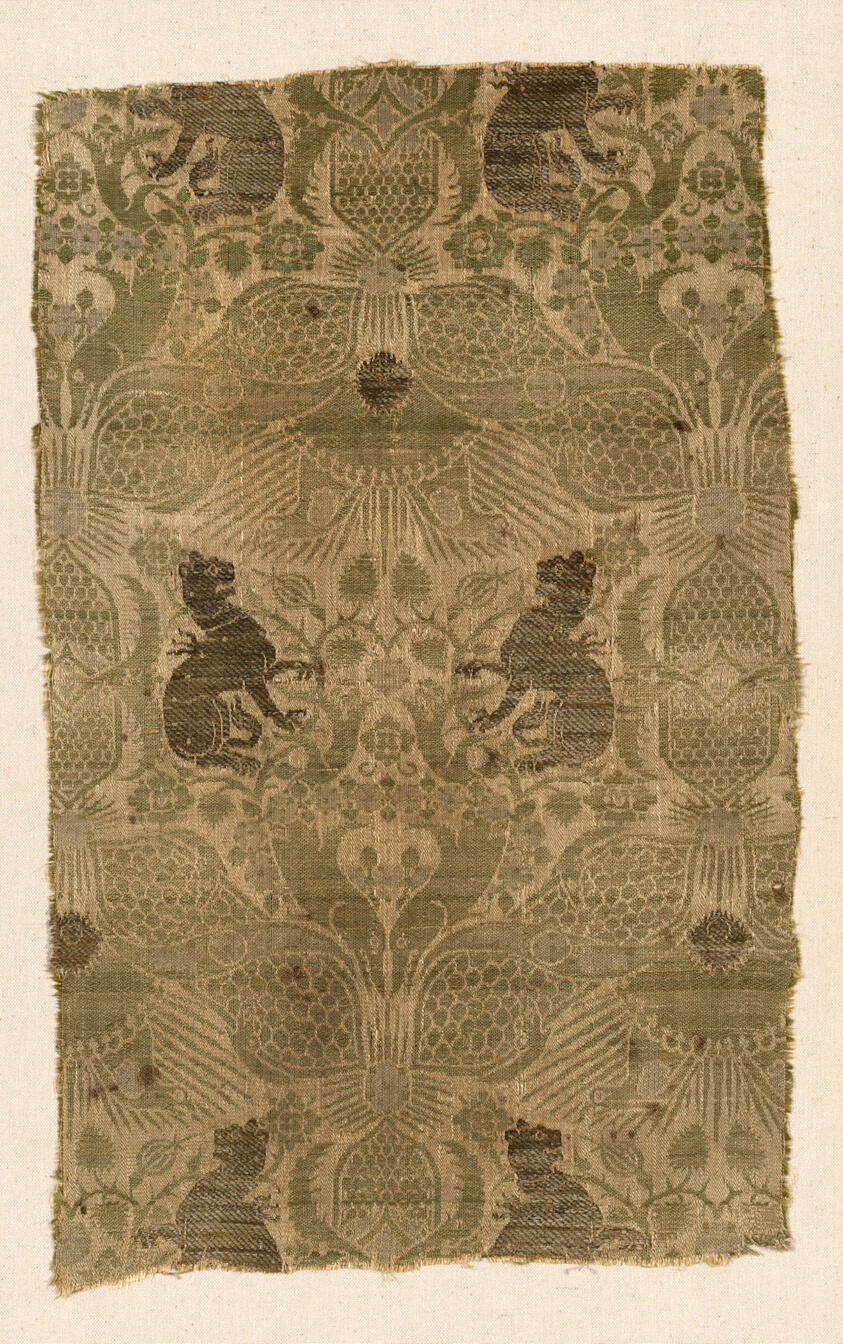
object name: Textile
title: Fragment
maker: Italy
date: 1401/1450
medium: Silk and gilt-animal-substrate-wrapped linen, warp-float faced 2:1 twill weave with supplementary patterning and brocading wefts bound by secondary binding warps in plain and twill interlacings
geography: Lucca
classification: textile; weaving